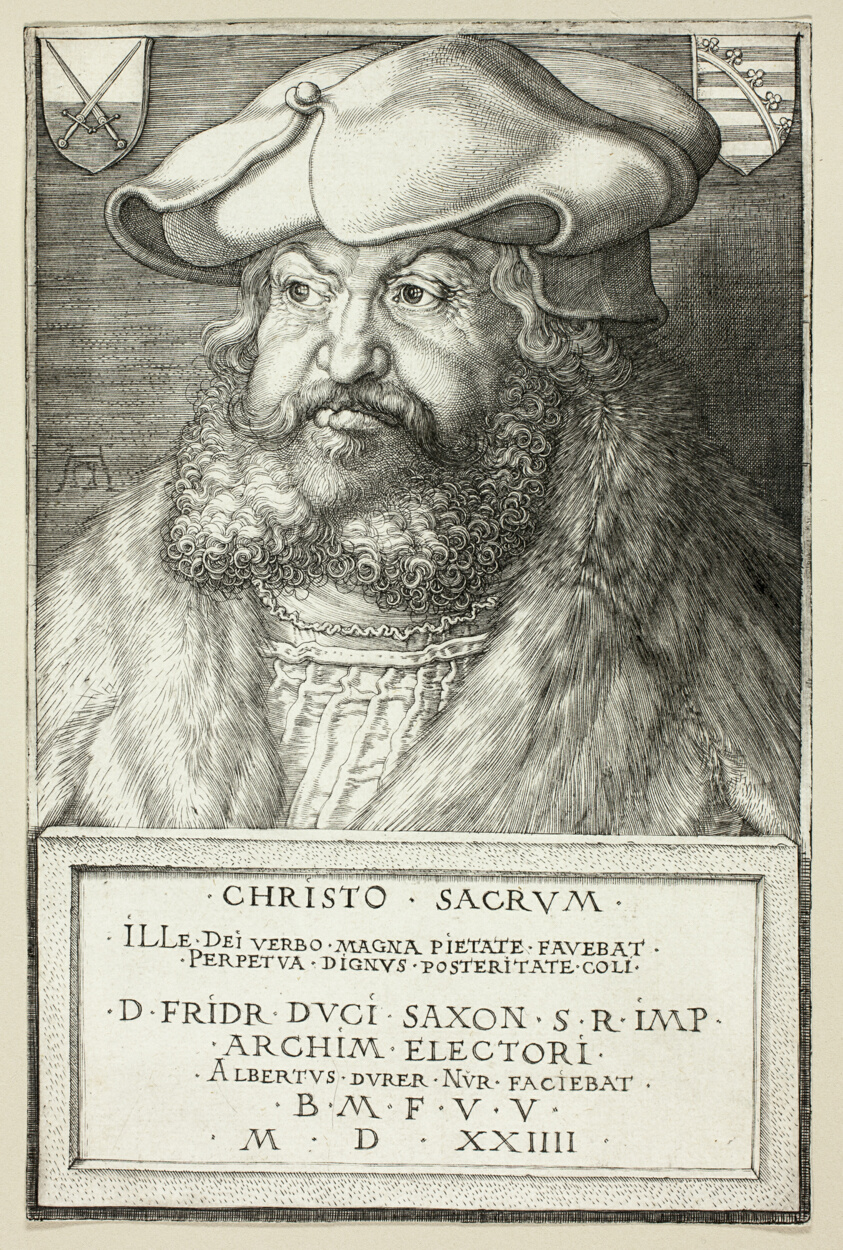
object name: Print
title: Elector Frederick the Wise of Saxony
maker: Albrecht Dürer (German, 1471-1528)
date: 1524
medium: Engraving in black on ivory laid paper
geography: Germany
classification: engraving; print; prints and drawing; paper